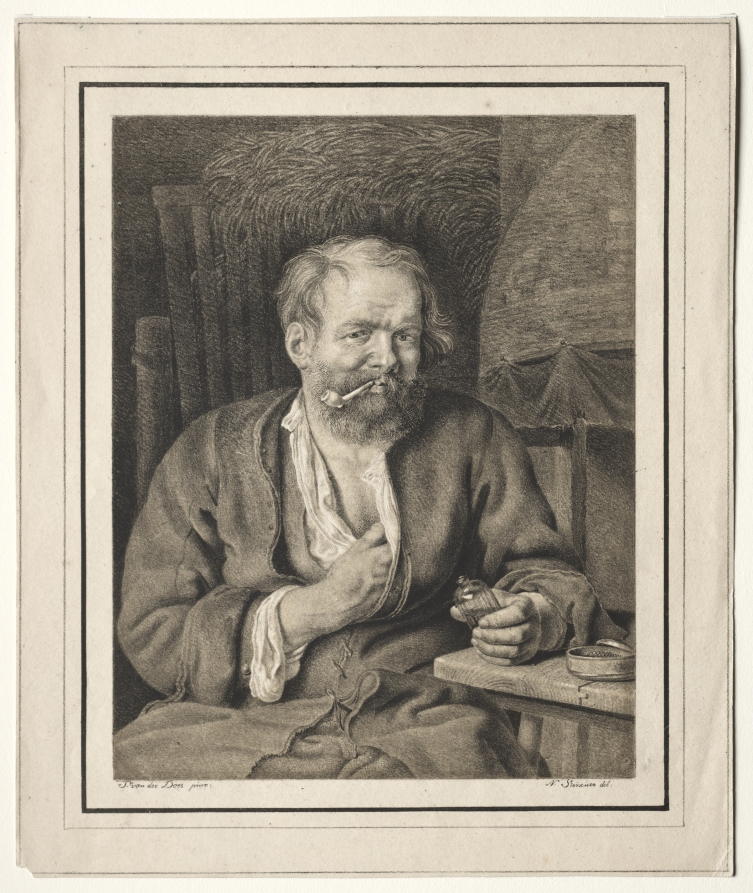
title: Peasant Sitting at a Table, Smoking a Pipe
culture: Germany, 19th century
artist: Johann Nepomuk Strixner (German, 1782–1855)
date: 1817–1821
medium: color lithograph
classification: Print